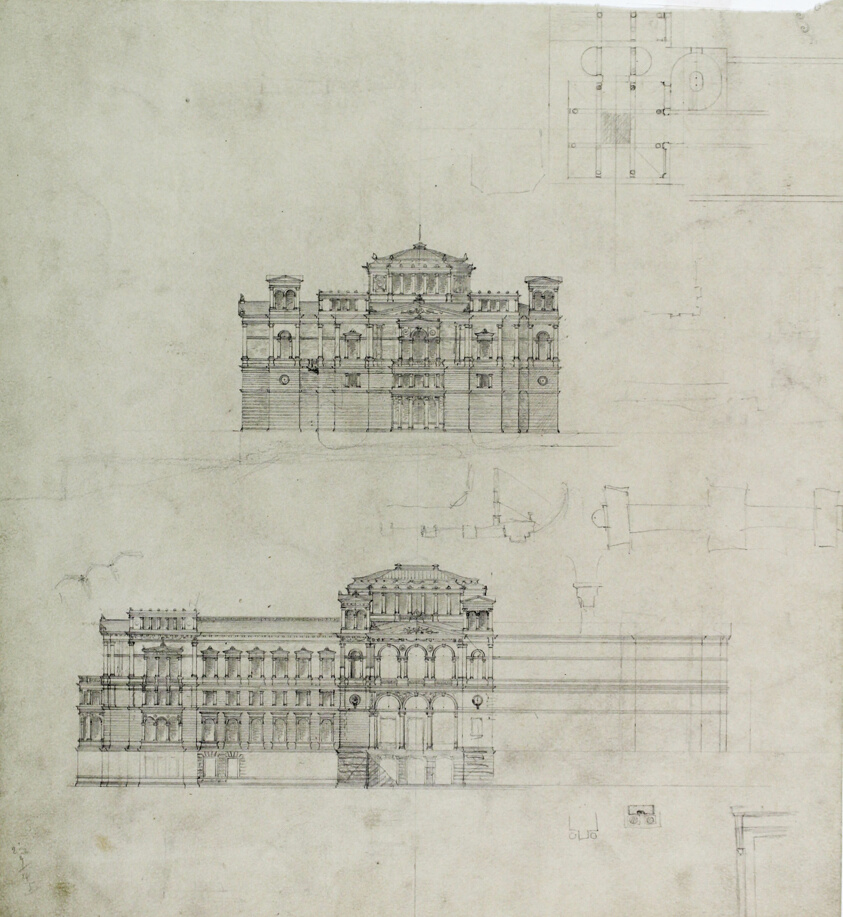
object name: Architectural Drawing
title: Design Projects, Elevation Studies and Plan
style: 19th century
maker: Carl (Charles) J. Furst (American, born Germany c. 1840–c. 1919)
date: c. 1860–1870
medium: Graphite on drawing paper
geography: United States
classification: architectural drawing; design; architecture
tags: projects, architecture, design